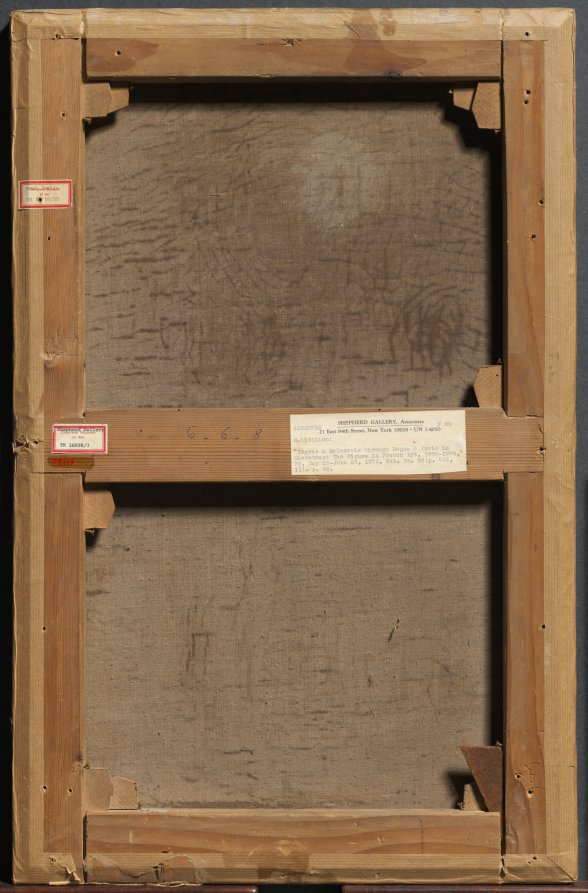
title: Princess Marie d'Orléans in Her Studio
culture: France, 19th century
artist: Ary Scheffer (Dutch, 1795–1858)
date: c. 1838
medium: oil on fabric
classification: Painting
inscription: Signed lower left: Ary Scheffer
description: Scheffer frequently portrayed his favorite pupil, the Princess Marie d'Orléans (1813-1839), daughter of King Louis Philippe and a prominent sculptor. As proof of her dedication and talent, she wears an artist's smock and holds a chisel. Seen nearby are several of her works, including her model of her most famous sculpture, a stoic depiction of Joan of Arc.